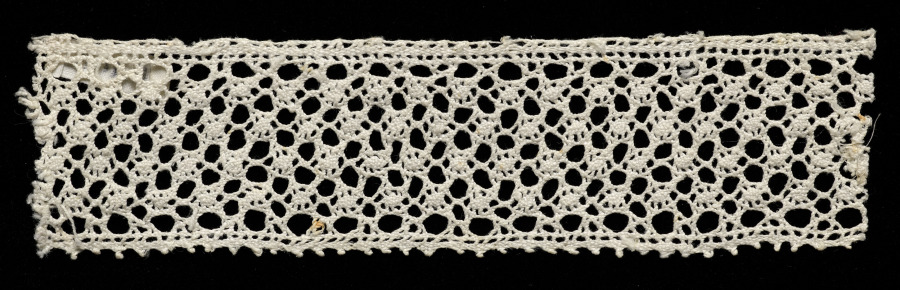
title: Lace Insertion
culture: Italy, Umbria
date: 1600s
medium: Bobbin lace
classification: Lace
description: The design motif of this piece of bobbin lace is called "piedi di gallina" (chicken's feet).